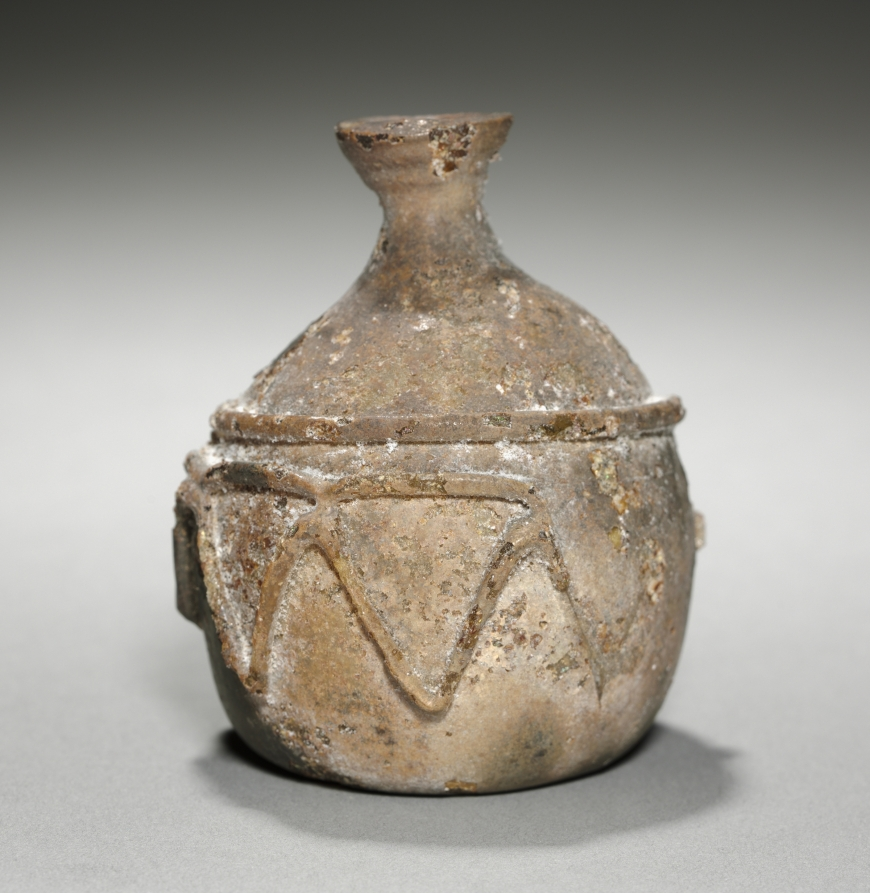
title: Vase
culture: Eastern Mediterranean, Roman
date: c. 200–500 CE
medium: glass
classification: Glass